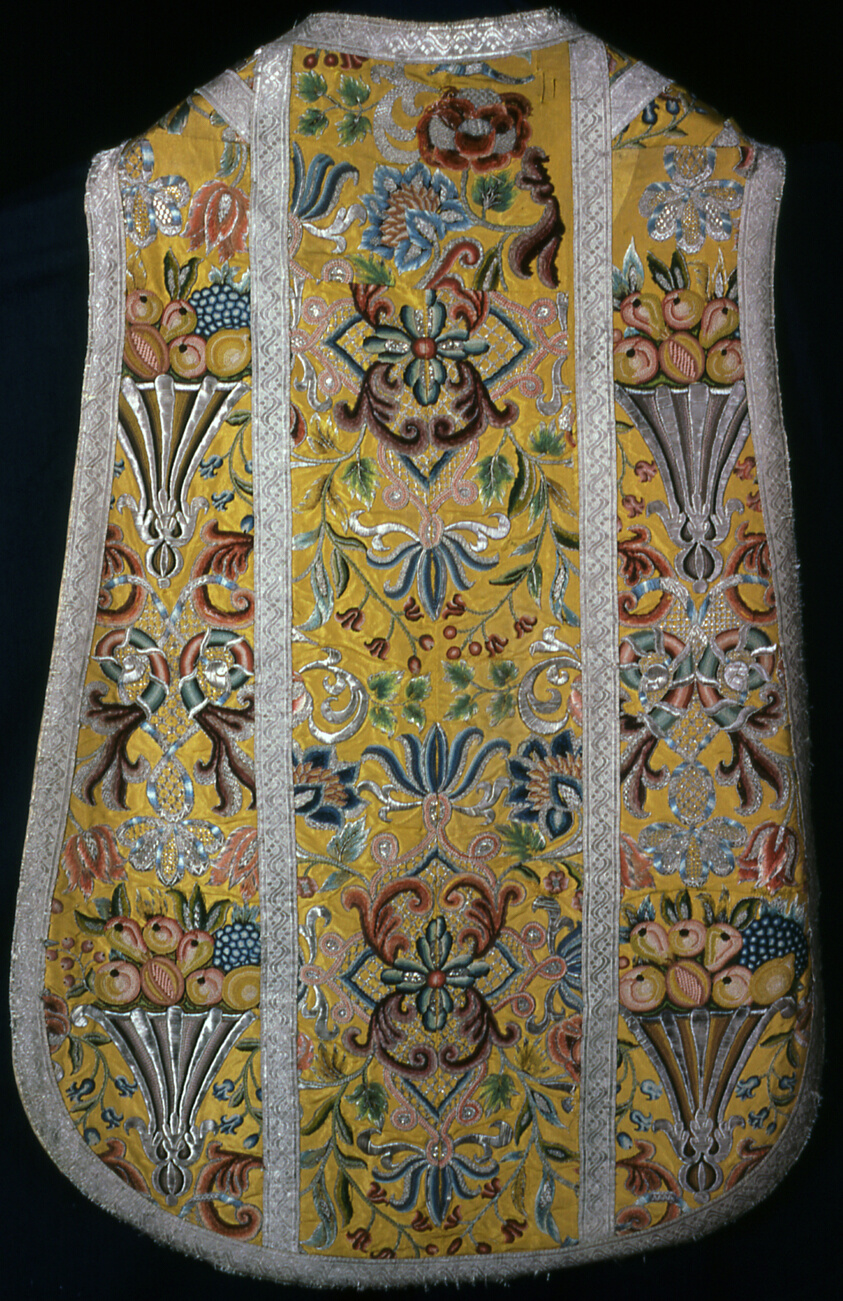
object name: Costume and Accessories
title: Chasuble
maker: Central Europe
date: 18th century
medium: Silk, weft-rib plain weave; embroidered in silk threads, gilt strip wound around a silk core, silk chenille threads, creped silk and metal coils in French knots, satin, outline and cross stitches, laid work, couching and paper padded couching; braid: silk and gilt strip wound around a silk core, plain weave with supplementary patterning wefts; lining: cotton, plain weave; glazed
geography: Central Europe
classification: textile; needlework (visual works); liturgical; costume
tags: floral arrangements